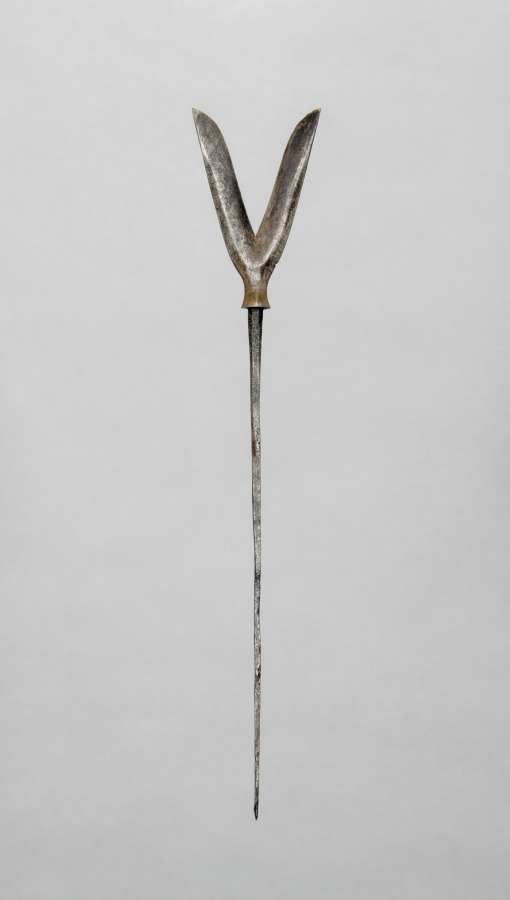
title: Arrow Point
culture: Japan, Edo period (1615–1868)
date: 1700s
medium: steel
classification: Arms and Armor